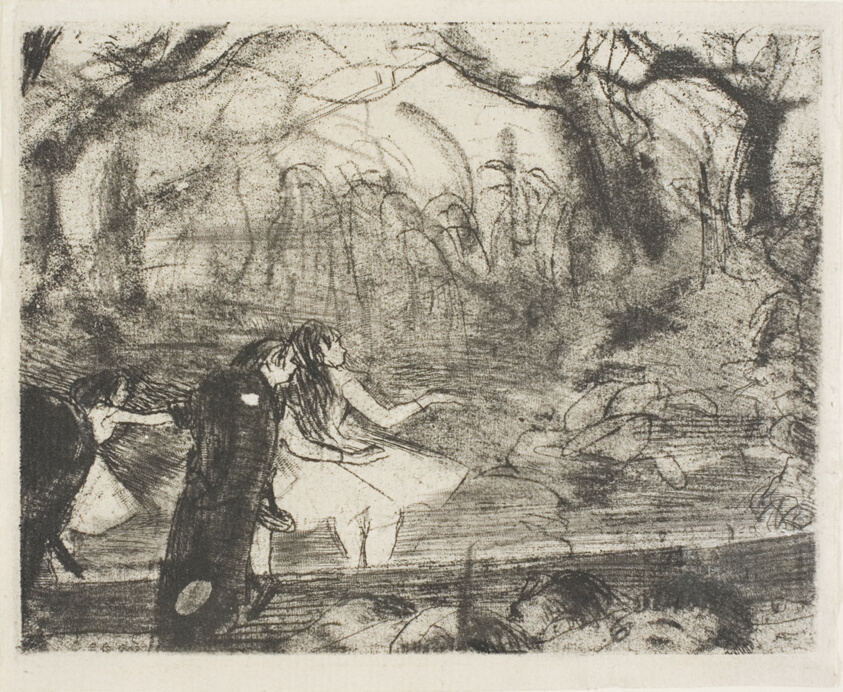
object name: Print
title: On Stage III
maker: Edgar Degas; French, 1834-1917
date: 1876–77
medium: Soft ground etching, drypoint and roulette on cream laid paper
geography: France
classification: etching; print; prints and drawing; paper